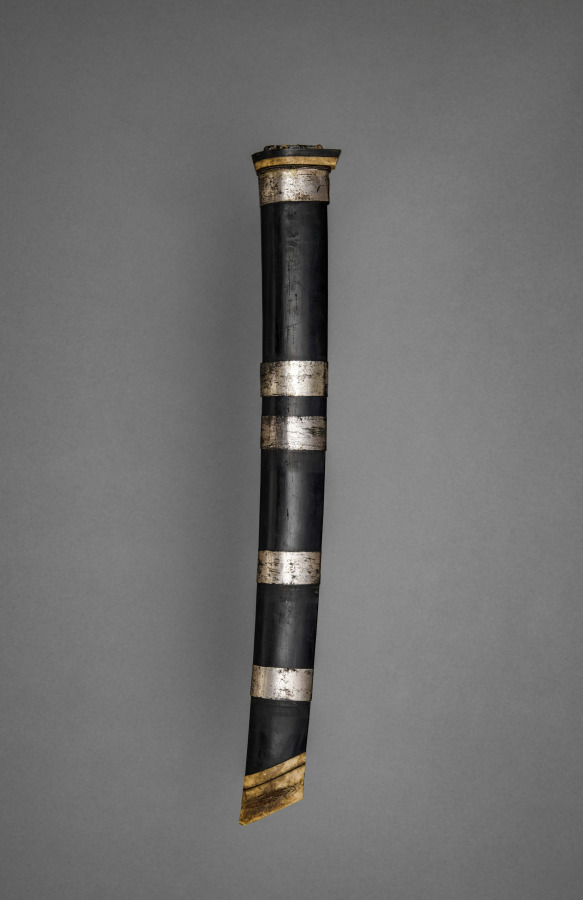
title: Scabbard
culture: Indonesia, Sulawesi (Celebes)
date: before 1916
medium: metal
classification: Arms and Armor